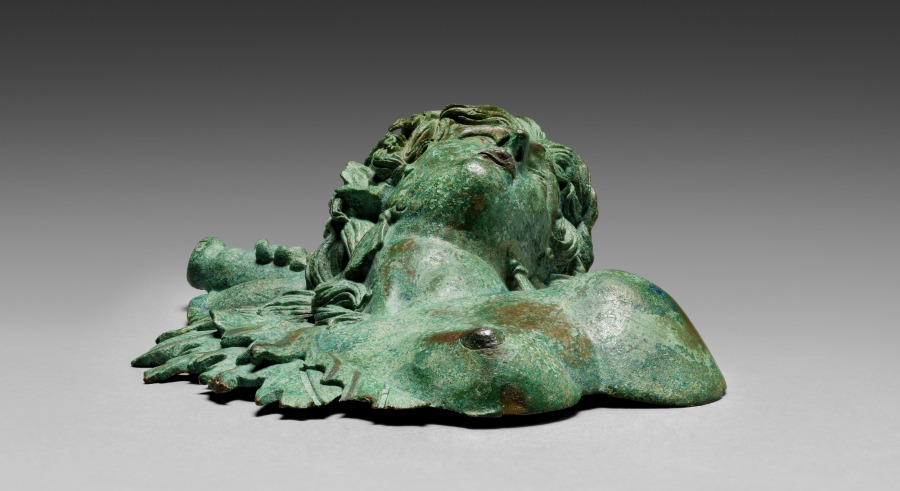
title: Tritoness or Scylla Relief Applique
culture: Greece, Hellenistic period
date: late 200s BCE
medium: bronze with copper inlays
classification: Metalwork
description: The seaweed garment, finned gills, and webbed ears give this female bust appliqué all the hallmarks of an ocean dweller. She may be a Tritoness, a minor goddess of the sea and the female counterpart to the more common Triton. However, her intense gaze and raised arm clutching perhaps the hilt of a sword suggest she may be Scylla, a sea monster that first appears in Homer’s Odyssey. Without the Tritoness’s fishtail or Scylla’s lower body made of dogs’ heads, it is difficult to differentiate. Certain features are highlighted with a copper inlay such as the lips, eyes, and gills.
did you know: Mythological sea creatures became popular metal vessel decorations around the 2nd-century BCE.